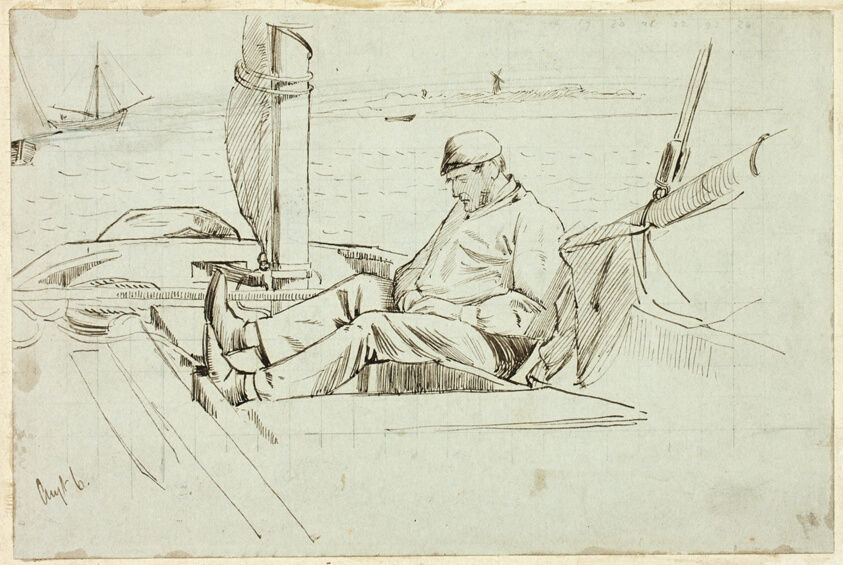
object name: Drawing and Watercolor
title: Man Seated in a Sailboat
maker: Attributed to Henry Stacy Marks; English, 1829-1898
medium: Pen and brown ink squared in graphite, on blue wove paper, laid down on ivory wove paper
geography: England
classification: pen and ink drawings; drawings (visual works); prints and drawing